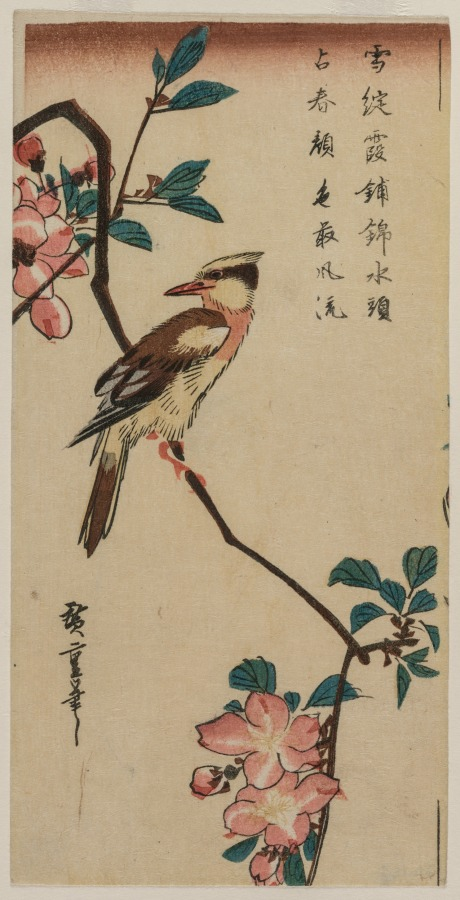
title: Black-Naped Oriole (Korean Warbler) on a Hall Crabapple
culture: Japan, Edo period (1615–1868)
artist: Utagawa Hiroshige (Japanese, 1797–1858)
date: 1832–35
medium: color woodblock print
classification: Print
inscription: Signature: Hiroshige hitsu